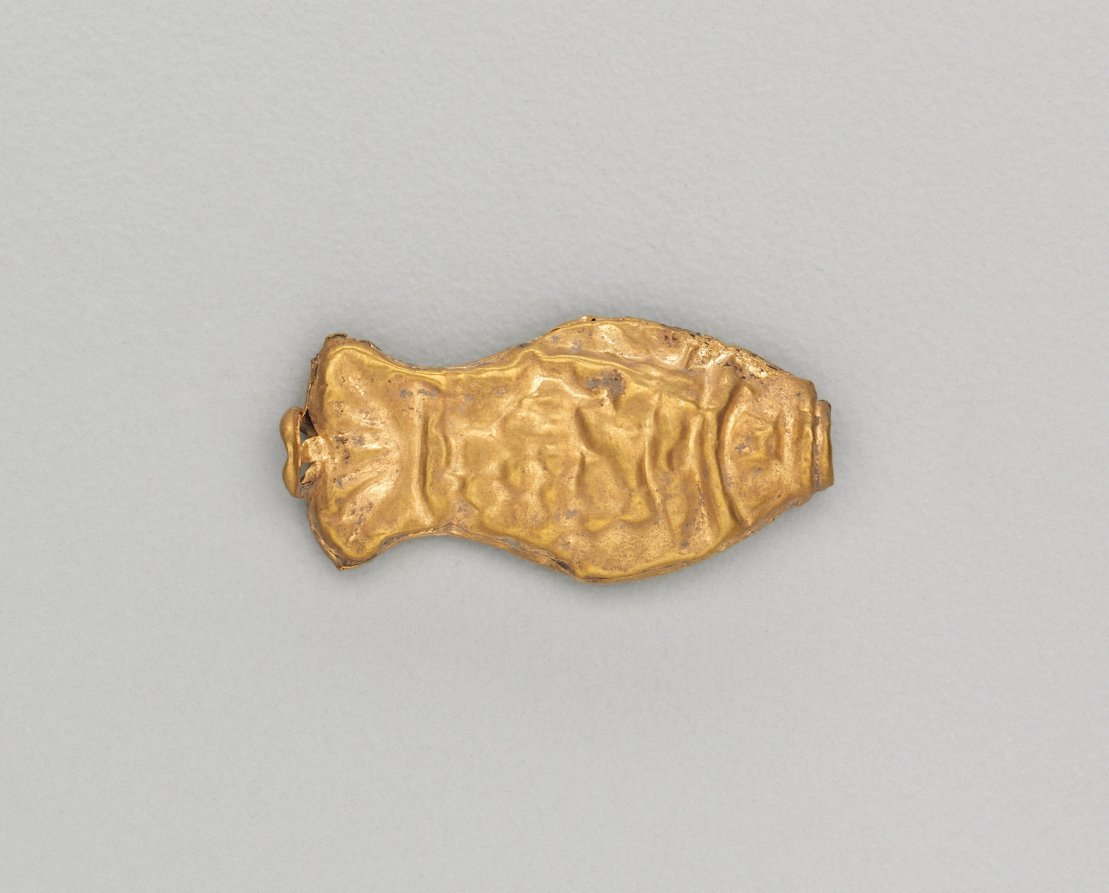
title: Necklace Bead in the Form of a Fish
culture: India, Shunga period (185–78 BCE)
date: 185–72 BCE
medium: gold repoussé with granulation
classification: Jewelry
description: Jewelry in ancient India often consisted of elements associated with water, such as fish and other aquatic plants and animals. Since water is essential for life, imagery that connotes water is life-affirming, or auspicious, and therefore appropriate adornment.